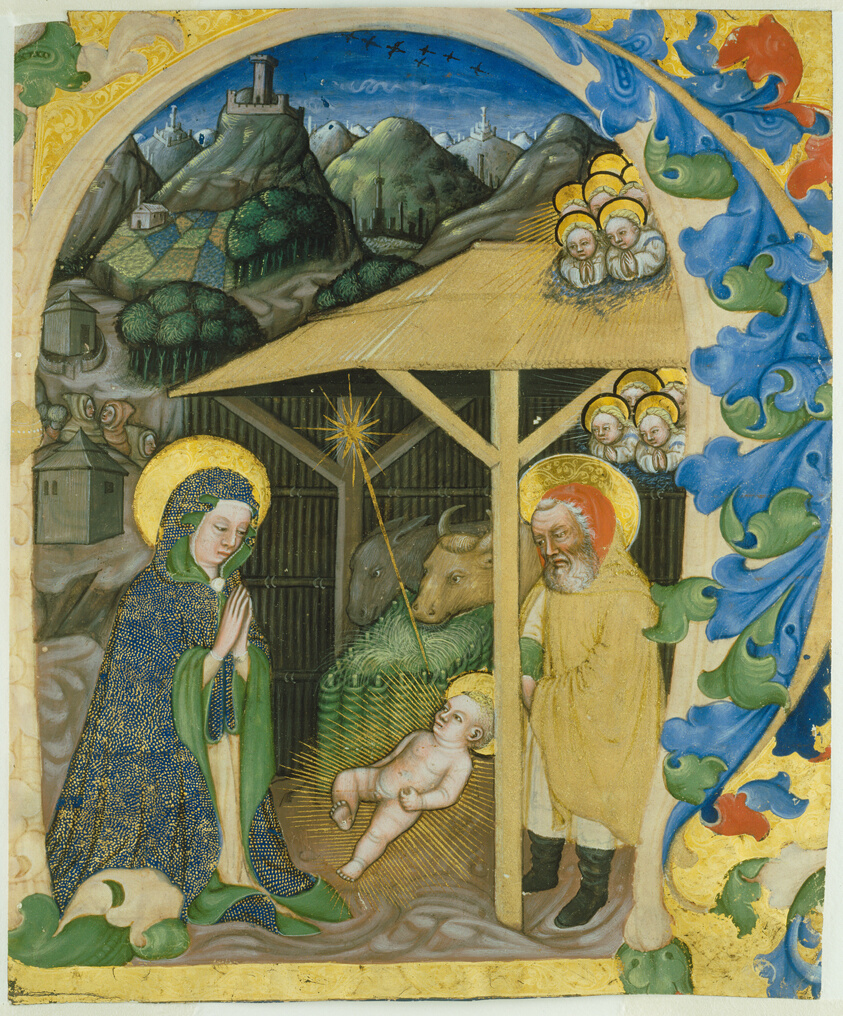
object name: Drawing and Watercolor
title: Nativity in an Initial H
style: medieval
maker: Zanino di Pietro (Giovanni di Francia); Italian, active 1389-1448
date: 1430/40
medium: Brush and gouache, heightened with gum arabic, gold leaf, and gold paint, over brush and black ink, on vellum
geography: Veneto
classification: gouache; manuscript; drawings (visual works); prints and drawing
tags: nativity scenes, Christian subjects, mythology, prints and drawings